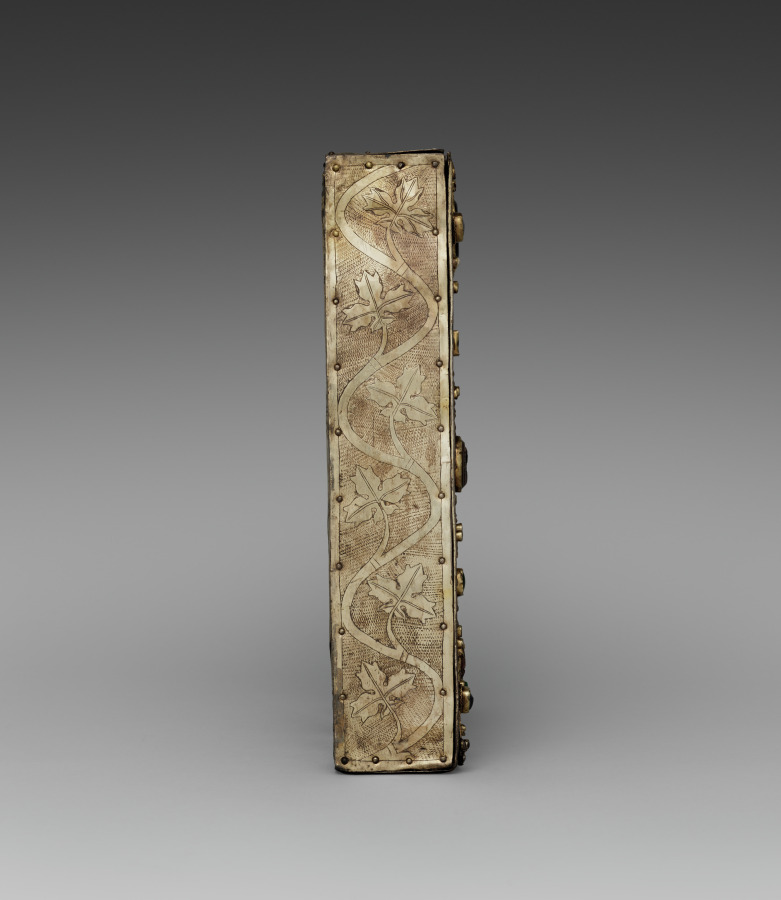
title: Book-Shaped Reliquary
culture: Ivory: Ottonian, Lorrain; Frame: Germany, Lower Saxony, Brunswick, Gothic period, 14th century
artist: circle of The Master of the Registrum Gregorii (German, active c. 972–1000)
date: c. 1000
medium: ivory, silver: gilded, pearls, rubies, emeralds, crystals, onyx, carnelian, oak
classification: Metalwork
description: This sumptuous object closely resembles a deluxe medieval book cover in both form and decoration. It was likely commissioned by Otto the Mild, Duke of Saxony (reigned 1318–48) around 1340. It was made to contain a leaf from each gospel and relics of the 11,000 virgins and 4 other saints. These relics were originally kept in a cavity behind the delicately carved ivory plaque depicting scenes from the Wedding at Cana (John 2:1–11). The story of Christ's first miracle is presented in three scenes. In the upper left, the Virgin informs Christ and his apostles of the lack of wine at the wedding banquet. On the right, the groom, his bride, and their guests sit behind a table, two servants offering them goblets. In the lower register, two attendants pour water into the first of six storage vessels while Christ addresses his mother and the bride. The back of the reliquary shows the engraved figures of the main patron saints of Brunswick Cathedral: placed within a delicate Gothic architectural frame, Saint John the Baptist is flanked by Saints Blaise and Thomas Becket.